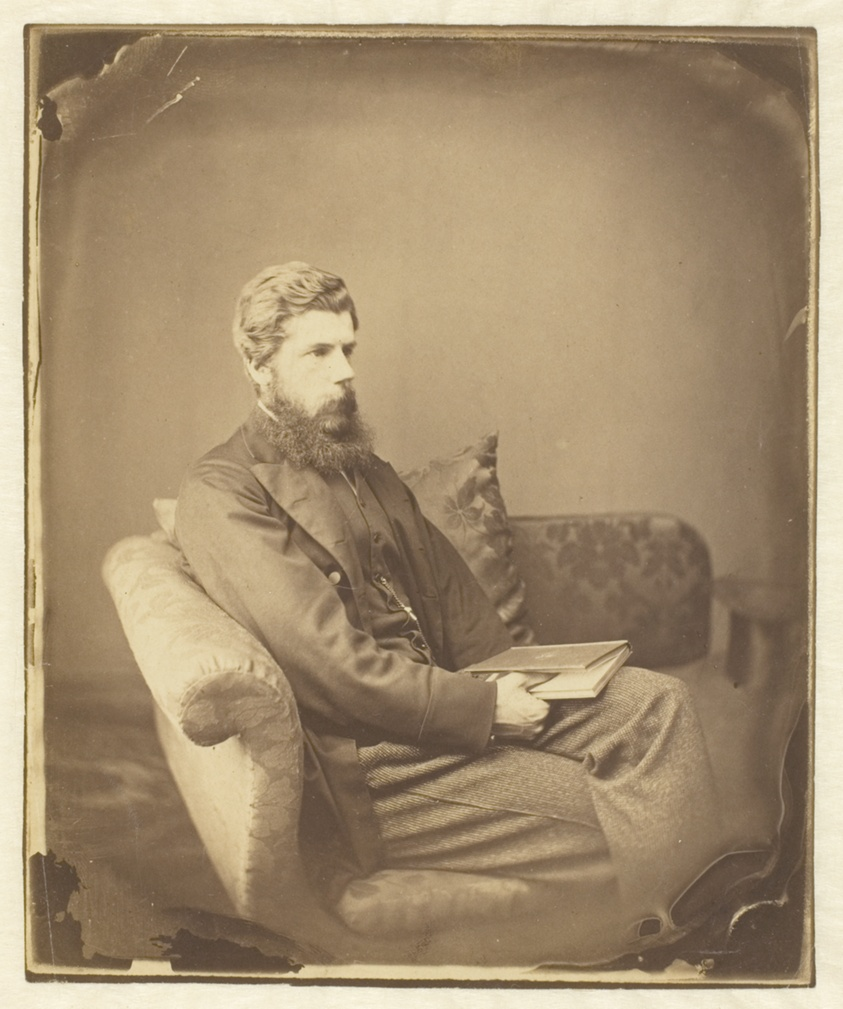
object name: Photograph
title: Rev. James Langton Clark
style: 19th century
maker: Lewis Carroll (Charles Lutwidge Dodgson); English, 1832–1898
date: 1864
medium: Albumen print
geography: England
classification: albumen silver print; photographic process; photography; photograph